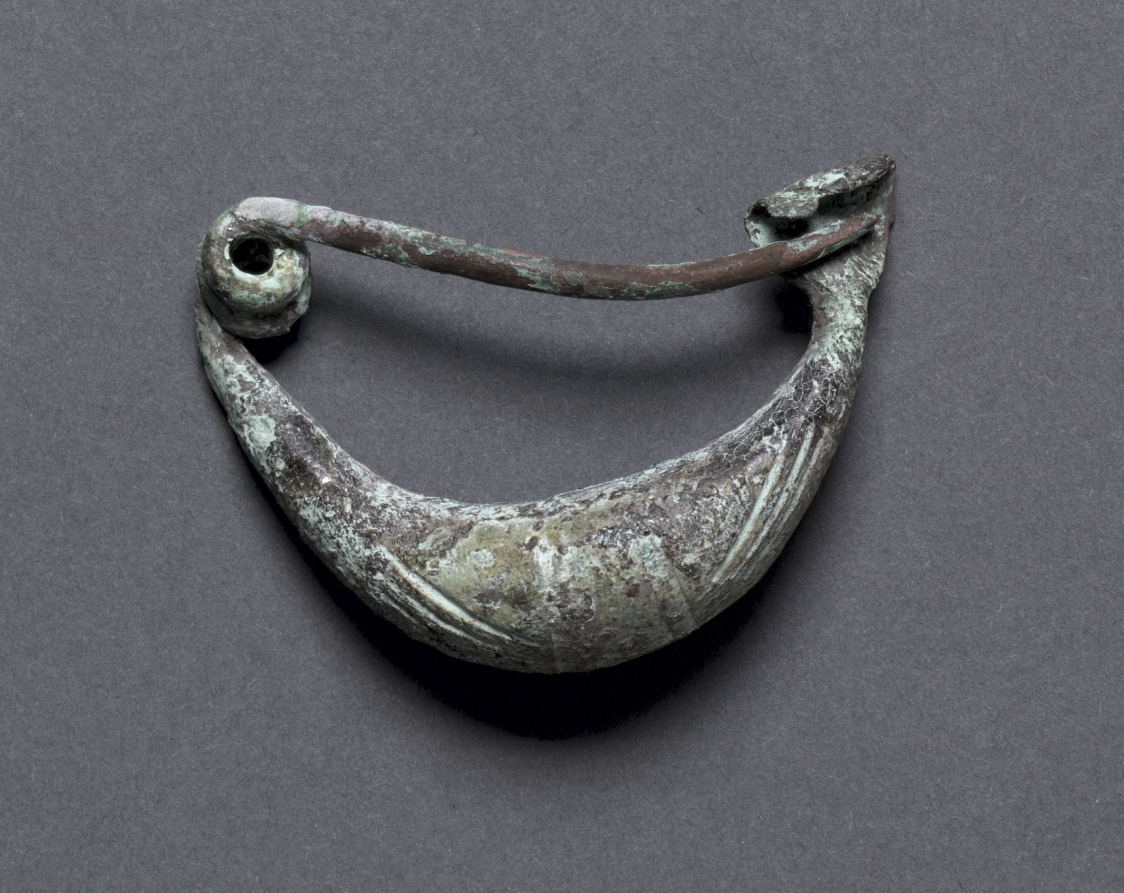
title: Boat-Shaped Fibula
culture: Etruscan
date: 900–700 BCE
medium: bronze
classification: Jewelry